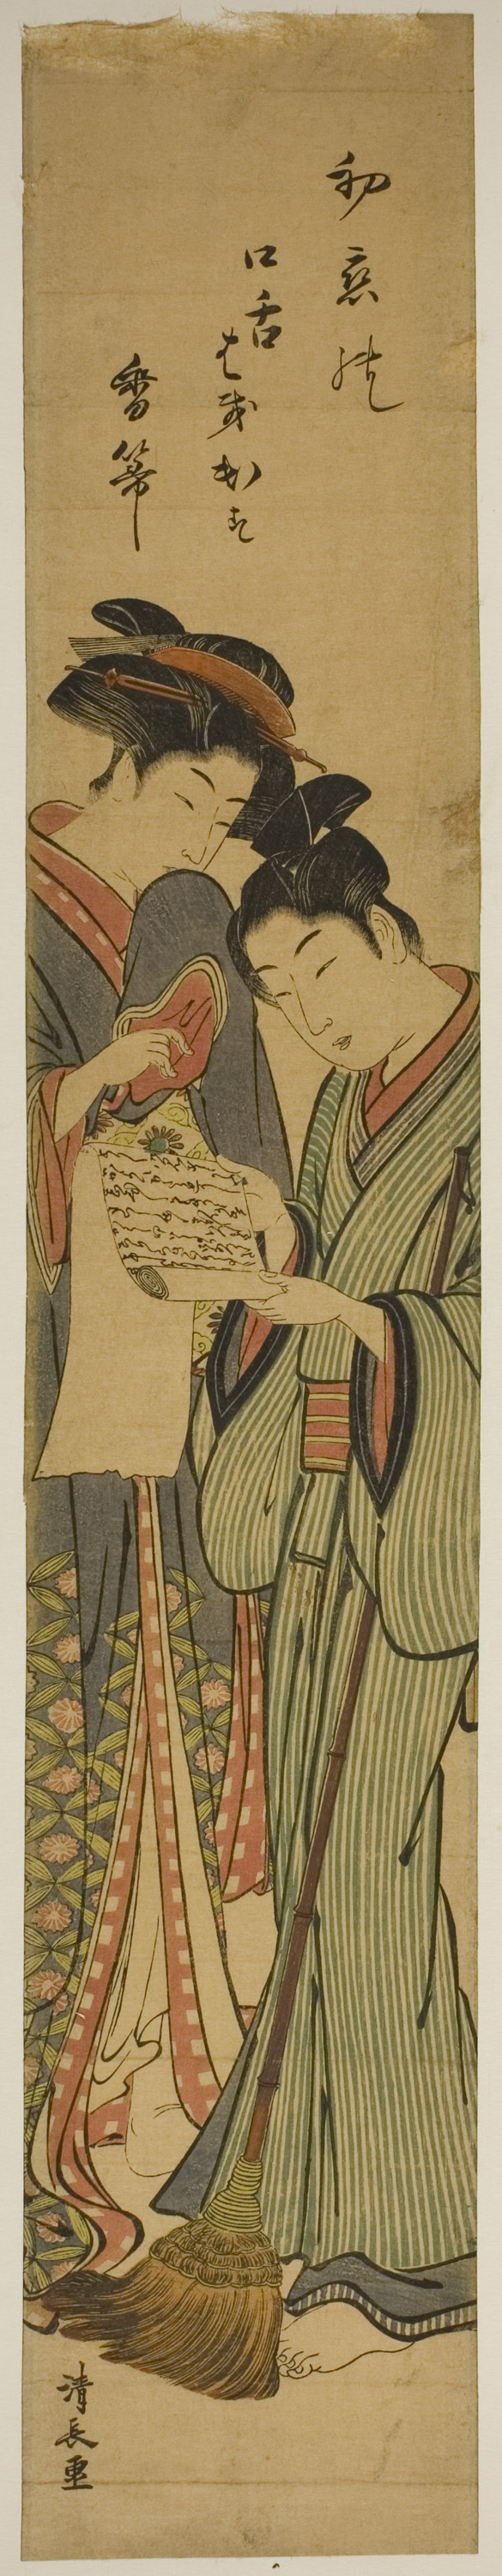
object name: Print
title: Parody of Kanzan and Jittoku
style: Japanese (culture or style)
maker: Torii Kiyonaga (Japanese, 1752-1815)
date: c. 1779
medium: Color woodblock print; hashira-e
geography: Japan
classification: woodblock print; print; asian art